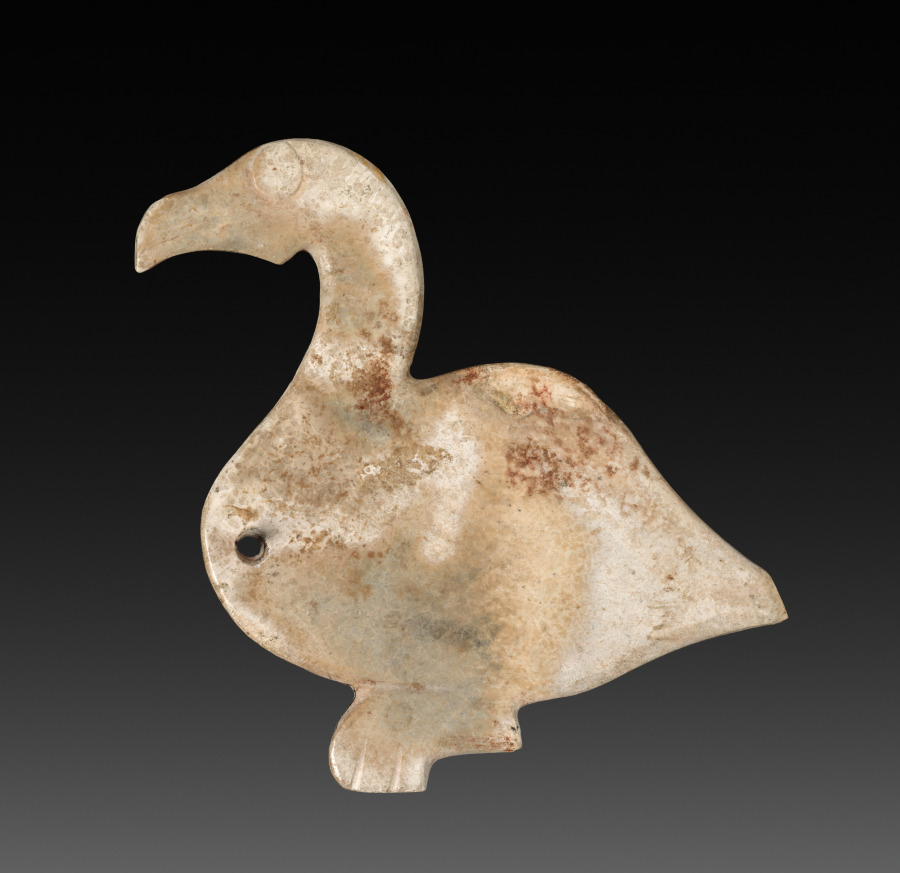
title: Goose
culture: China, Western Zhou dynasty (c. 1046–771 BCE)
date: 1100–900 BCE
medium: jade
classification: Jade